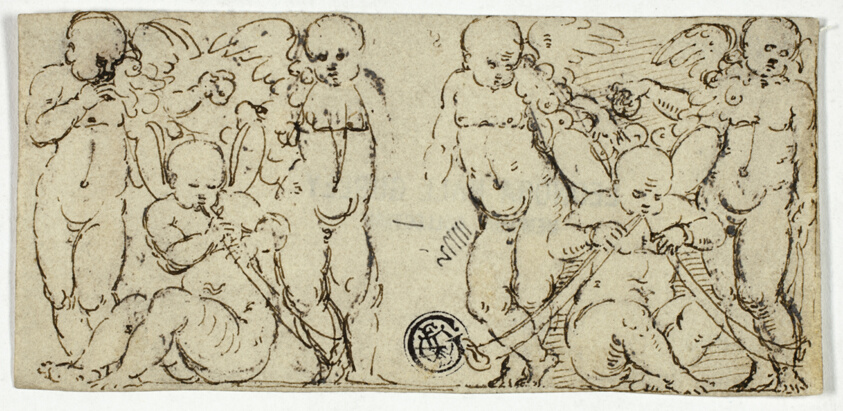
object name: Drawing and Watercolor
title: Two Decorative Groups of Putti with Trumpets and Fruit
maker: Unknown Artist; German, 16th century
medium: Pen and brown ink, on cream wove paper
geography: Germany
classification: pen and ink drawings; drawings (visual works); prints and drawing